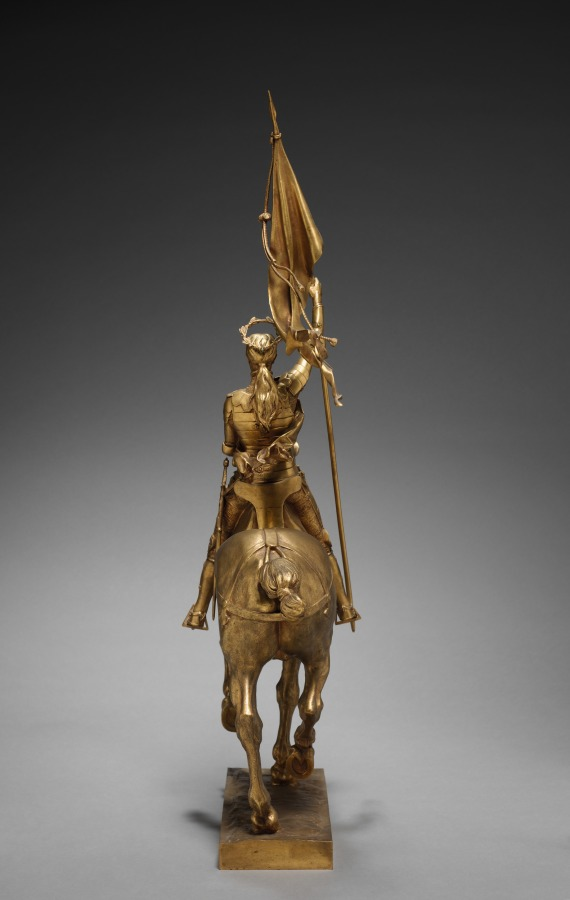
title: St. Joan of Arc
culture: France, 19th century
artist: Emmanuel Fremiet (French, 1824–1910)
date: 1874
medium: gilt bronze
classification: Sculpture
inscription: signed: "FREMIET"; inscription on flag: "IHS, MARIA."